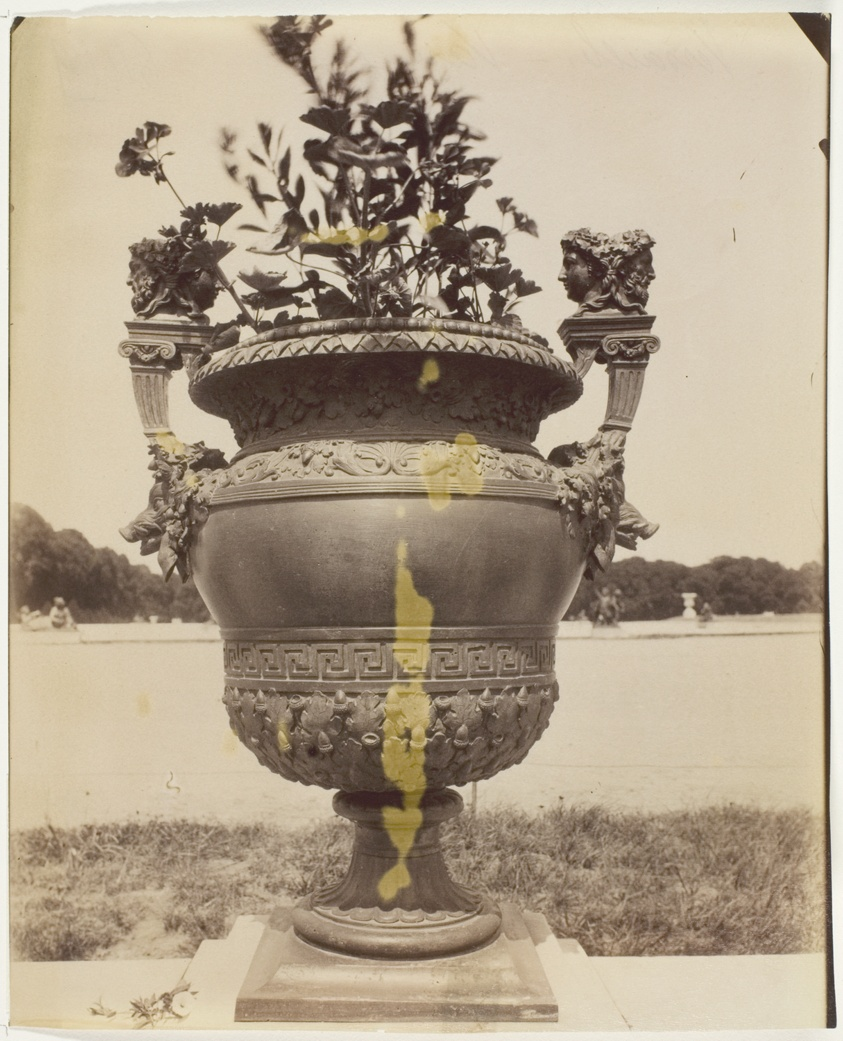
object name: Photograph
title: Versailles, Vase par Ballin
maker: Jean-Eugène-Auguste Atget (French, 1857–1927)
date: 1903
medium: Albumen print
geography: France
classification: albumen silver print; photographic process; photography; photograph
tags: Collected by Hugh Edwards